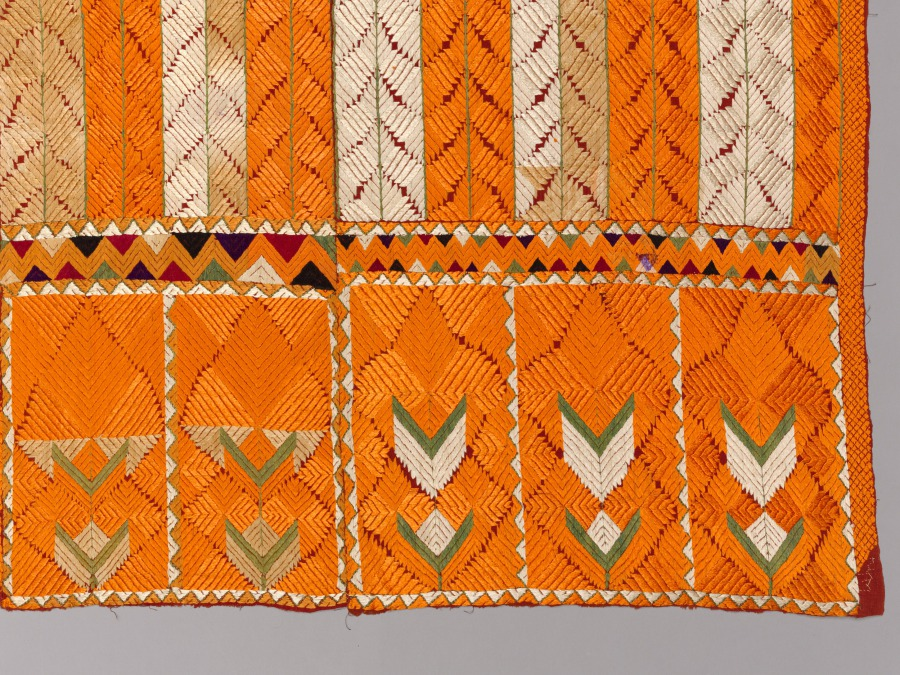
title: Shawl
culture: India, Punjab, 19th century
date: 1800s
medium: embroidery (phulkari); cotton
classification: Embroidery